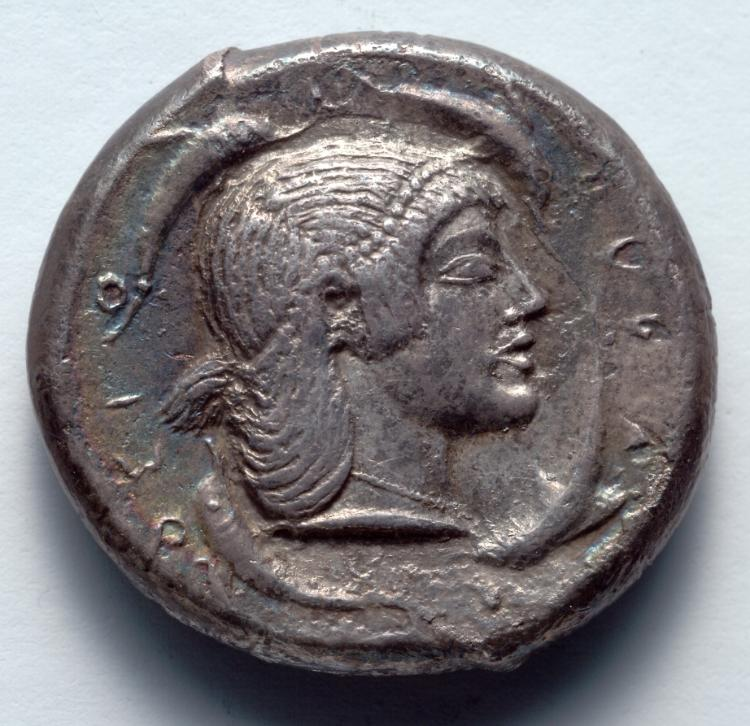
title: Tetradrachm: Head of Artemis/Arethousa, dolphins (reverse)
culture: Greek, minted at Syracuse (Sicily)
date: 485–478 BCE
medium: silver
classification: Coins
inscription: [ΣΥΡΑΚ] - ΟΣΙΟ[Ν]